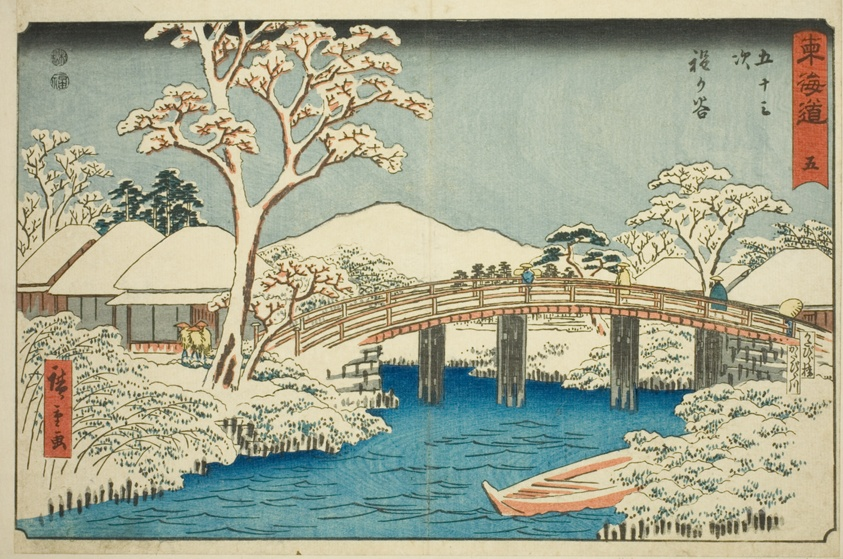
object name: Print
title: Hodogaya: Katabira River and Katabira Brige (Hodogaya, Katabiragawa Katabirabashi)—No. 5, from the series "Fifty-three Stations of the Tokaido (Tokaido gojusan tsugi)," also known as the Reisho Tokaido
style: Japanese (culture or style)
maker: Utagawa Hiroshige 歌川 広重; Japanese, 1797-1858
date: c. 1847/52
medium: Color woodblock print; oban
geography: Japan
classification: woodblock print; print; asian art